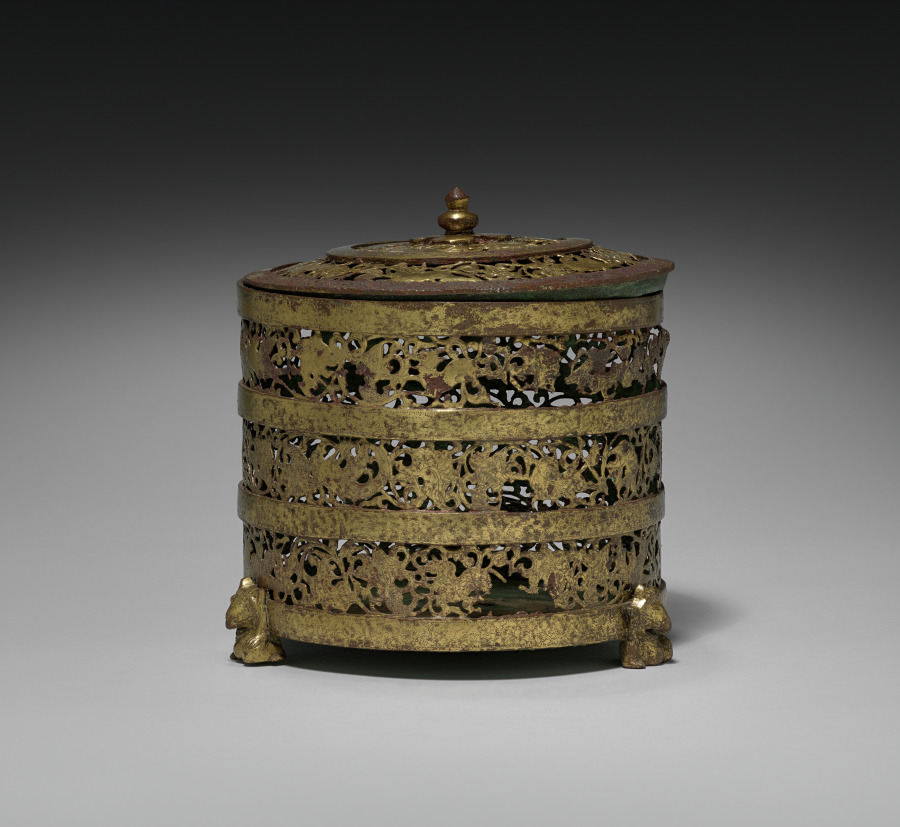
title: Cylindrical Container with Cover (Lian)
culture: China, Han dynasty (202 BCE–220 CE)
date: 100 BCE–100 CE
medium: gilt bronze with openwork and chased designs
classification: Metalwork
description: This magnificent gilded bronze vessel with openwork decoration shows all kinds of fabulous creatures, real and imaginary, chasing each other among swirling scrolls. There is an emphasis on the unbroken rhythms of movement, rather than the ferocity of animals in combat. Cylindrical bronze vessels in this shape, called lian, were often used as cosmetic boxes.